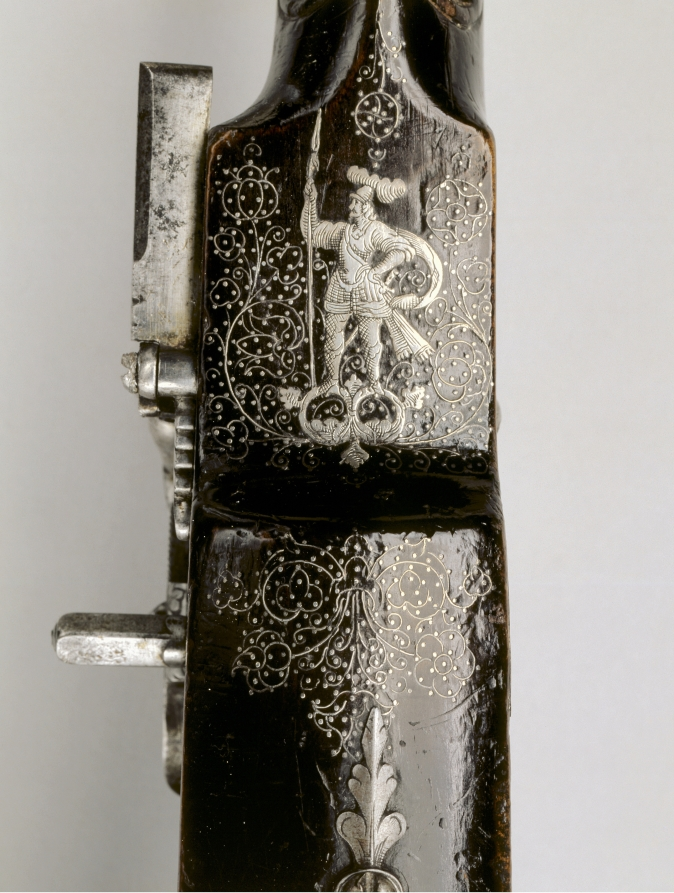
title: Wheel-Lock Hunting Rifle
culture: Austria, Ferlach, mid 17th Century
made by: Hans Schmidt (Austrian, 1669)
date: mid-1600s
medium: steel, varnished wood (walnut) stock decorated with inlaid silver wire and appliqués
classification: Arms and Armor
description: The barrel of this hunting piece is marked with the letters "GS" within a shield, the likely initials of the owner, who was probably a member of the Order of the Golden Fleece as indicated by the escutcheon on the stock.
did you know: A similar rifle made for another member of the Order of the Golden Fleece, Graf Sigmund von Dietrichstein, is preserved in Vienna.